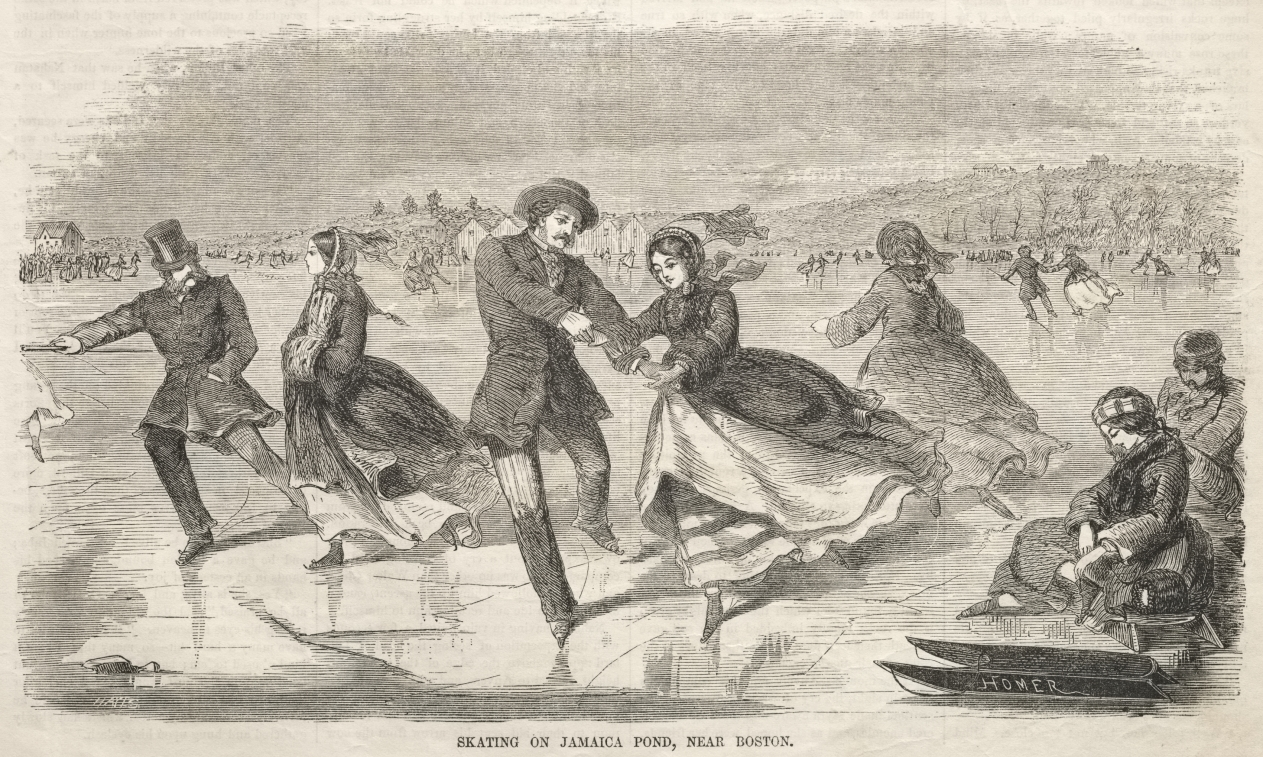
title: Skating on Jamaica Pond, near Boston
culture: America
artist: Winslow Homer (American, 1836–1910)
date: 1859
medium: wood engraving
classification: Print